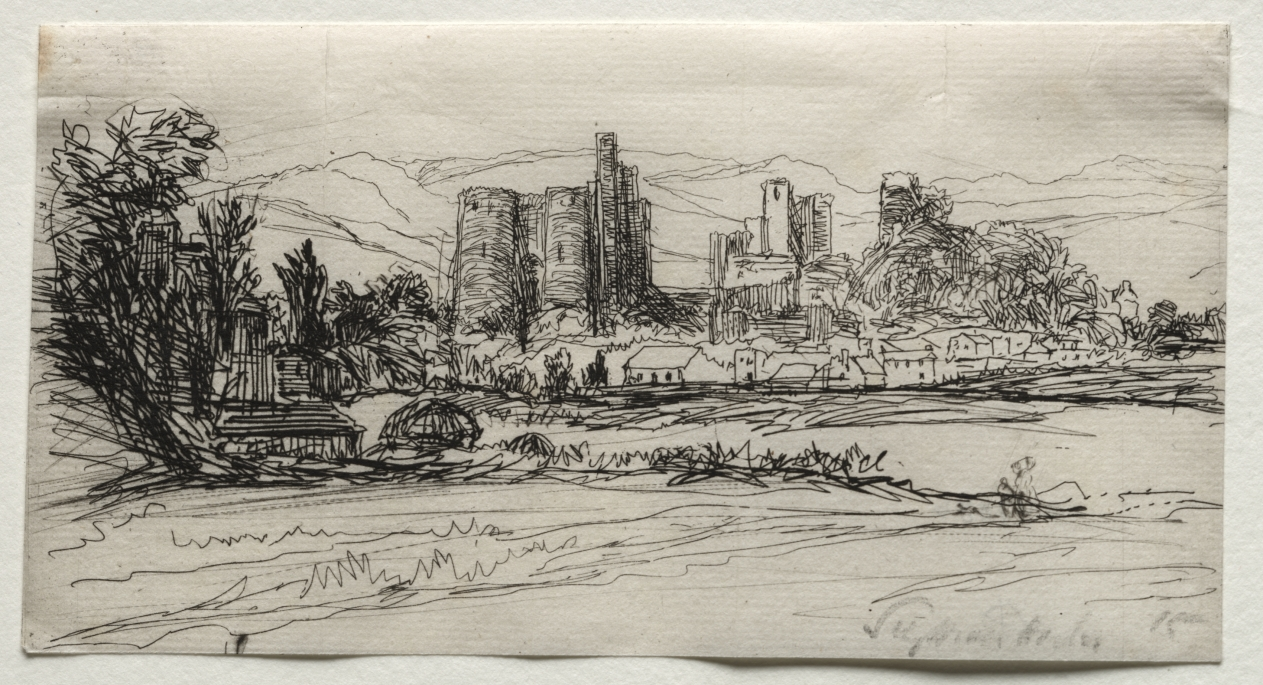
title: Kidwelly Castle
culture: England, 19th century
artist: Francis Seymour Haden (British, 1818–1910)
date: 1859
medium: etching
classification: Print